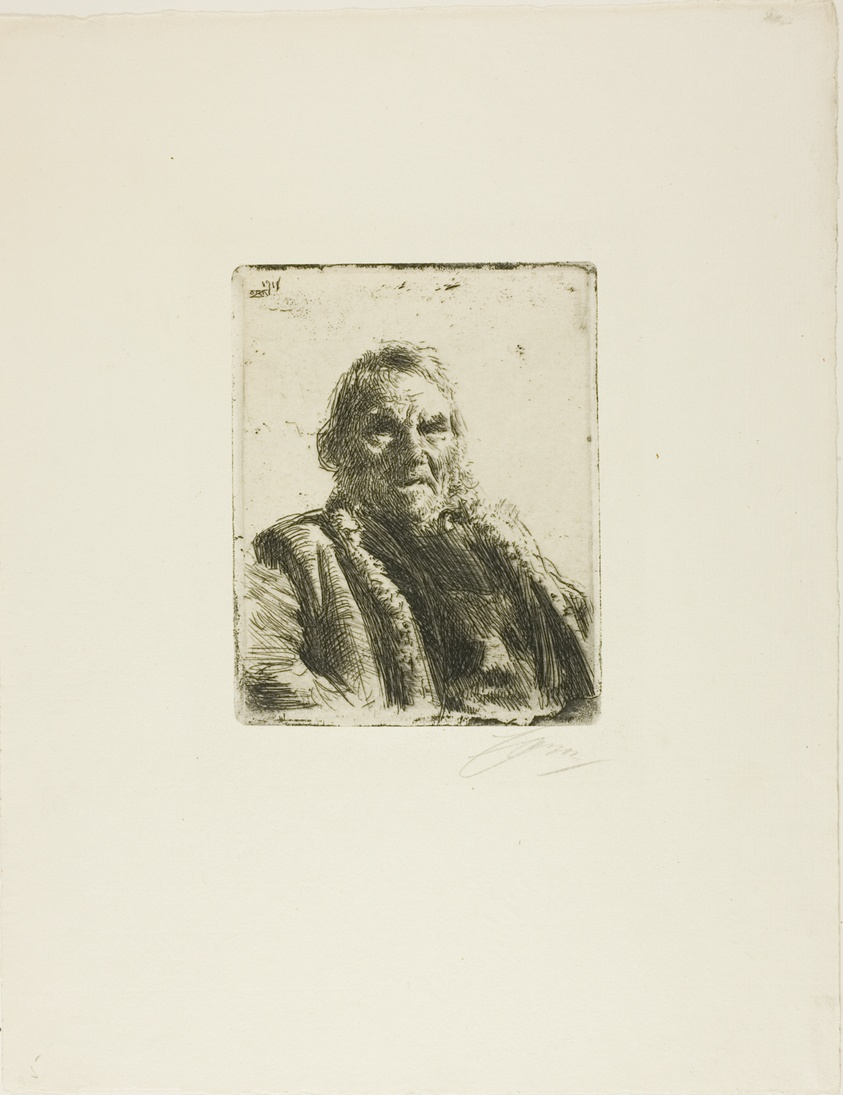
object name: Print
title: Old Soldier ("Prinsen")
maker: Anders Zorn (Swedish, 1860-1920)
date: 1911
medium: Etching on ivory laid paper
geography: Sweden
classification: etching; print; prints and drawing